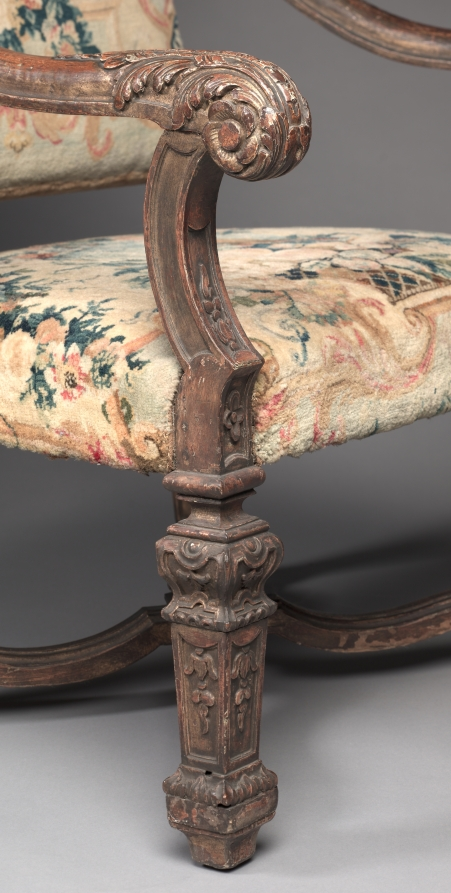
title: Armchair (4 of 4)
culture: France, 18th century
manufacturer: Royal Savonnerie Manufactory, Chaillot Workshops (French, est. 1627)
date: before 1717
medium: carved wood, Savonnerie knotted-pile (symmertrical rug knot) upholstery; wool, hemp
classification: Furniture and woodwork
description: These chairs belong to a suite that includes a settee (also in the CMA’s collection) and a tapestry made for a count and countess to mark their wedding in 1717. Furniture of this scale was usually placed against the wall in grand reception halls, more as a display of wealth than for use. Upholstered in Savonnerie tapestries, this suite was among the most treasured and expensive example anyone could own and typically reserved for royalty. To add decorative and intellectual interest to the textiles, weavers incorporated symbols depicting various stories from the Fables of Jean de La Fontaine, published from 1668 to 1694 and largely adapted from Aesop and other early storytellers.